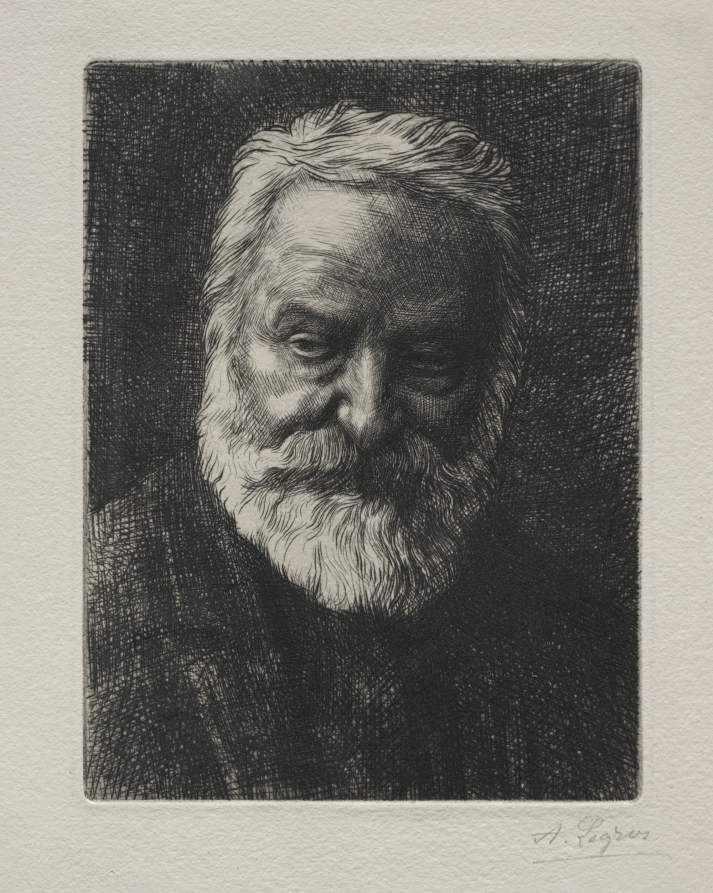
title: Portrait of Victor Hugo (2nd Plate)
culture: France, 19th century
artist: Alphonse Legros (French, 1837–1911)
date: c. 1857–1911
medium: etching and drypoint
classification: Print